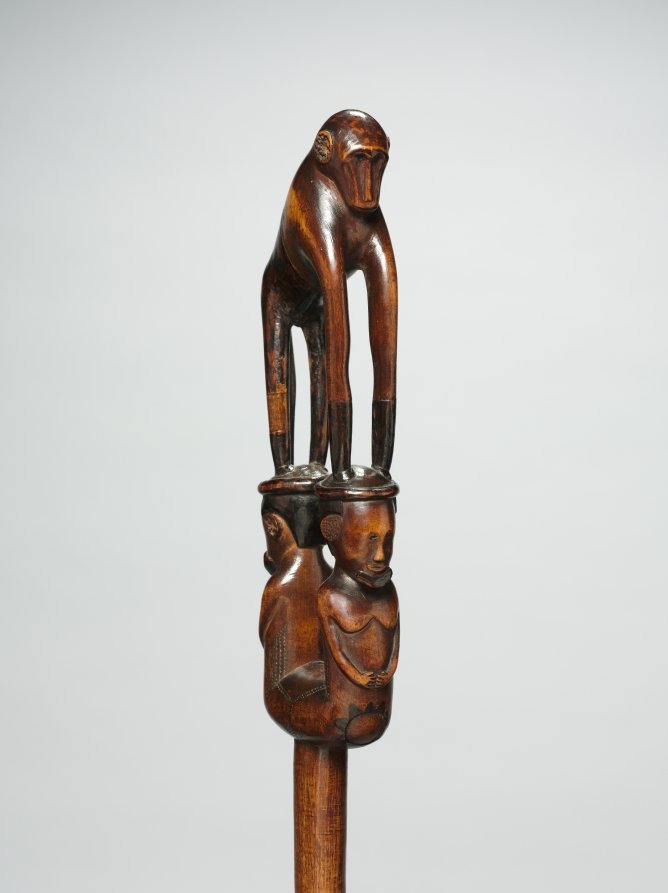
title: Staff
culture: Africa, South Africa, South Africa or Mozambique, probably Tsonga peoples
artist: The Baboon Master (probably Tsonga peoples)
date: 1800s–1900s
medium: Wood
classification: Sculpture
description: Arguably the finest surviving carving of the Baboon Master in a Western collection, this staff features exceptionally sophisticated articulation and detailing. The circular pokerwork motif on one side—which echoes the treatment of the ears on the male heads supporting the baboon—may represent a shield or a leaf. The heads feature the characteristic ornament that signifies maturity and marriage; covered with a mixture of gum, charcoal, and oil, this hairdo, called isicoco, employed a fiber or sinew ring into which the wearer’s hair was woven.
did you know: Artists working on the African continent often moved from place to place; the artist nicknamed The Baboon Master was of the Tsonga culture and worked in the Zulu kingdom.